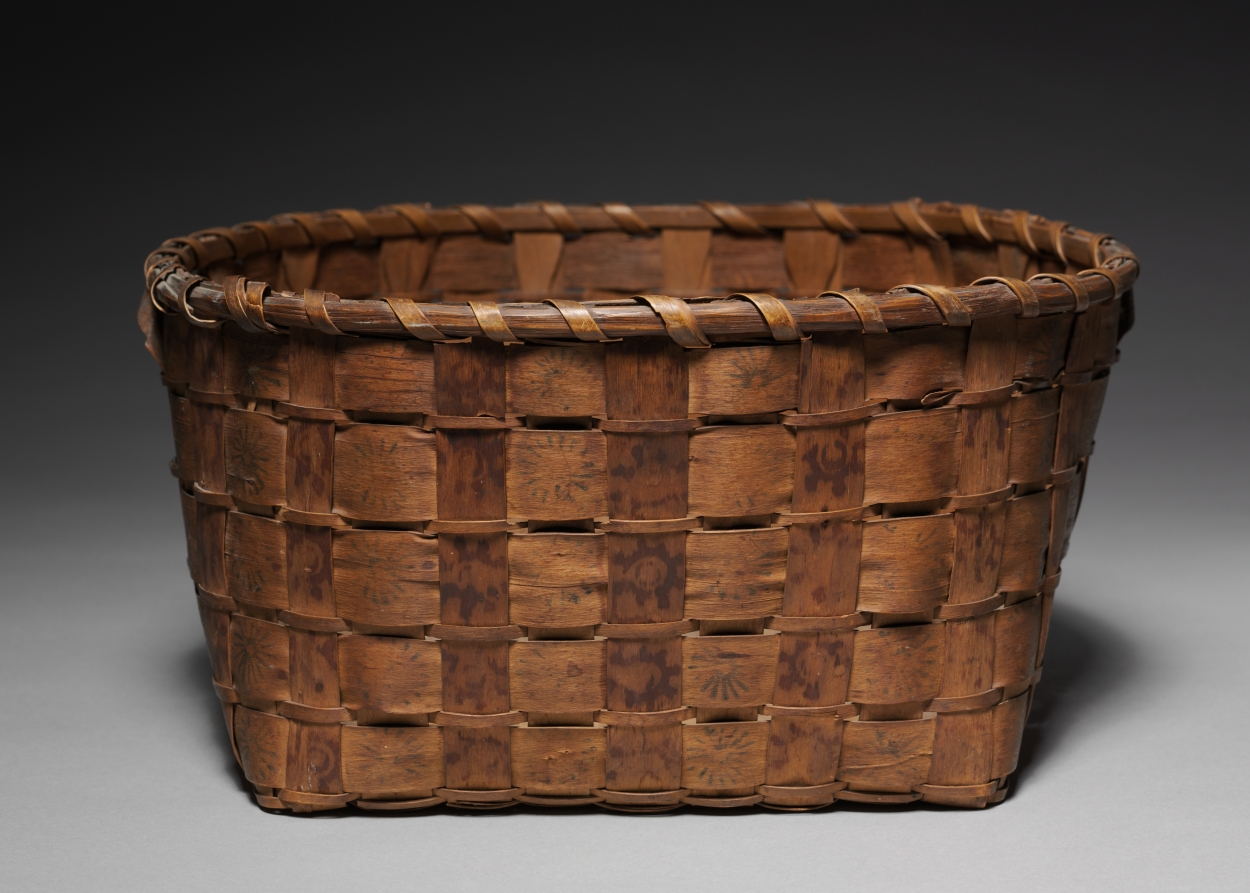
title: Basket with Stamped Decoration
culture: Native North America, Woodlands, Algonquian or Haudenosaunee (Iroquois), Post-contact Period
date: early 1800s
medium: ash? strips, pigment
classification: Basketry